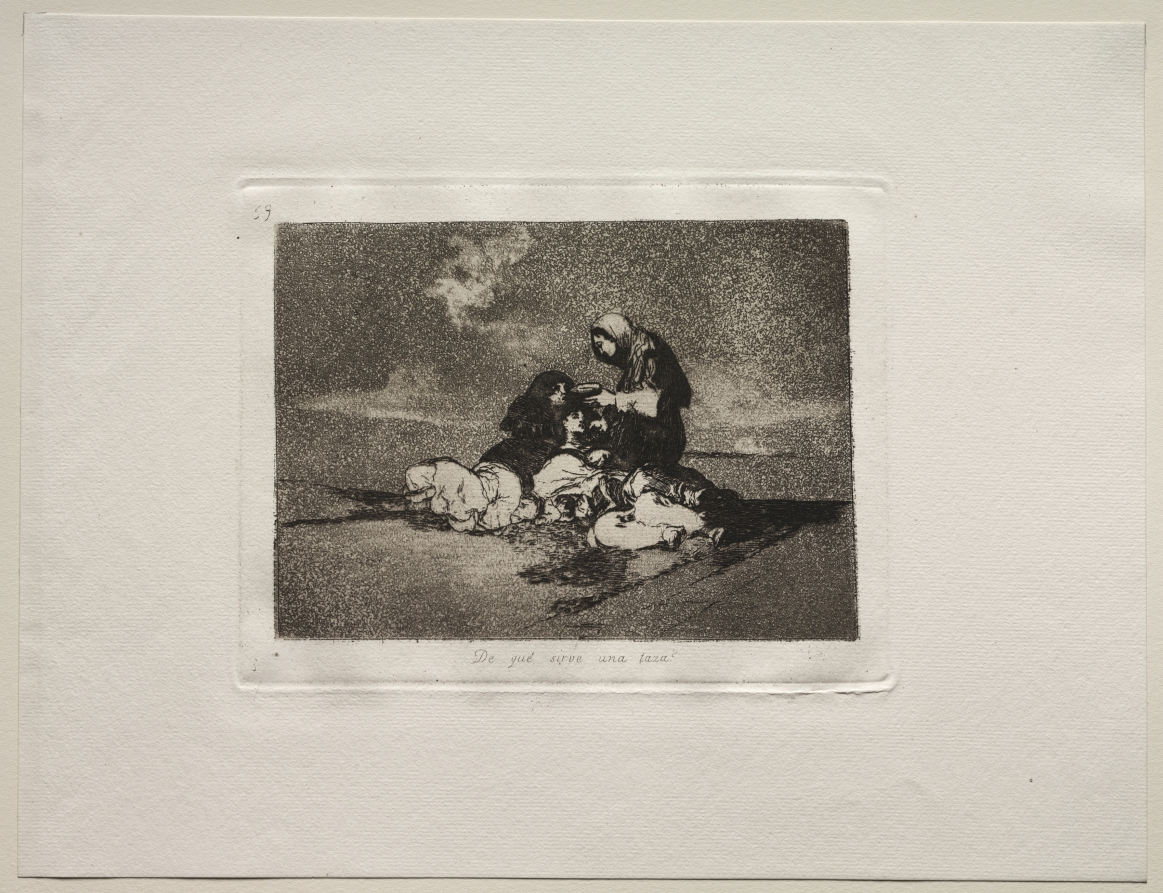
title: The Horrors of War: What is the Use of a Cup?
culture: Spain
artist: Francisco de Goya (Spanish, 1746–1828)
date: c. 1810–20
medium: etching and aquatint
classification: Print